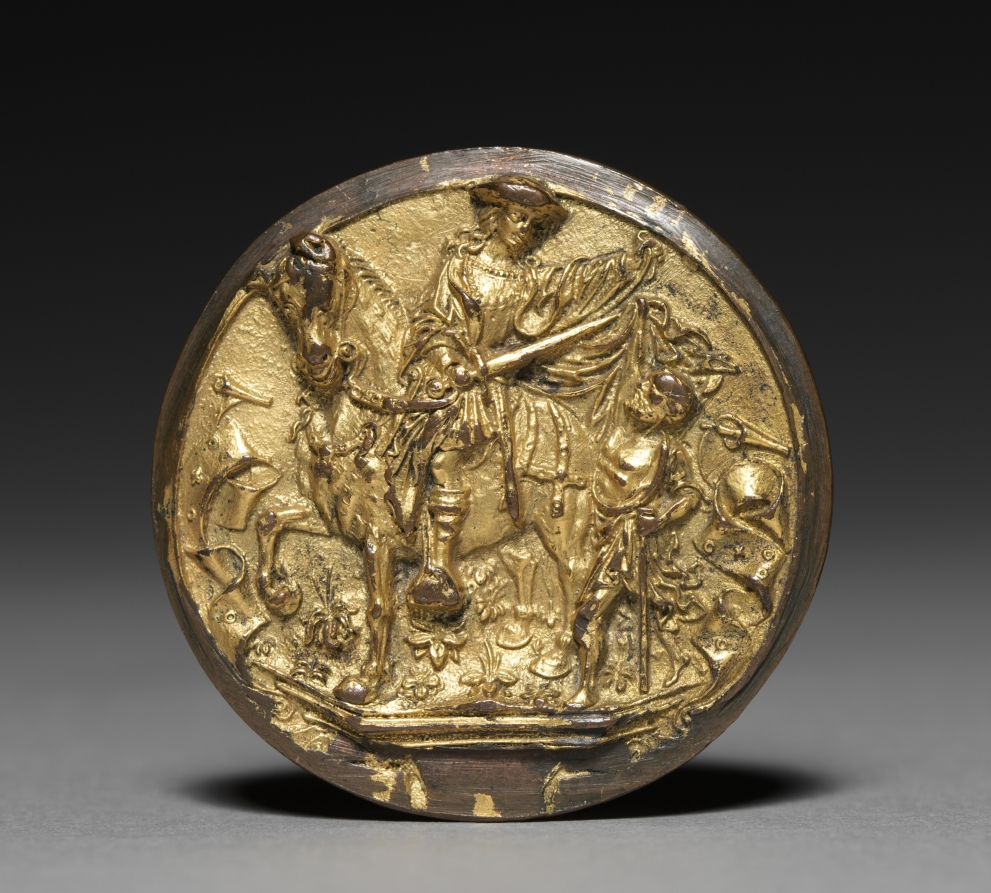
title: Saint Martin and the Beggar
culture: Germany, early 16th century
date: early 1500s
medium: gilt bronze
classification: Sculpture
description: This plate is an appliqué seal, intended as a decorative element for a garment or possibly as a simple pilgrimage medallion. The work tells a story of charity. It depicts Martin of Tours, a French soldier of the fourth century who, when accosted by a beggar at the gates of Amiens, cut a portion of his cloak and gave it to him. Saint Martin is depicted midway through cutting away his cloak with his saber. The bronze is often attributed to an artist in the northern Netherlands, which is due in part to the popularity of several motifs there at the turn of the sixteenth century. The depiction of plant life, for instance, is highly detailed, recalling Netherlandish scenes of the time. A similar seal (now in Berlin) belonged to Johann Potken, who was the provost of the Monastery of Saint Martin. This monastery was located in the now-German city of Emmerich am Rhein, not far from the Dutch city of Nijmegen. Despite the seal's Germanic attributes, the figures' physical qualities suggest the artist's awareness of Italian Renaissance art.